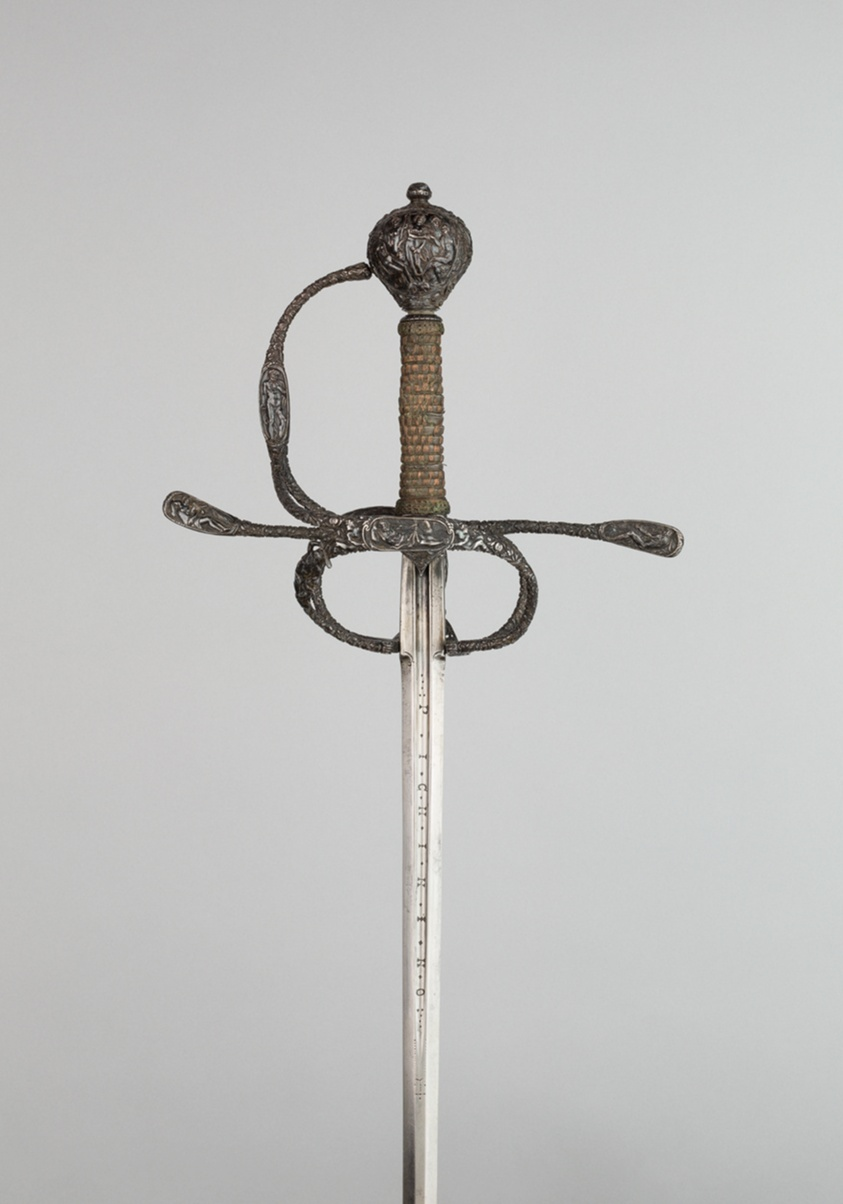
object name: Arms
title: Rapier and Scabbard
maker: Probably Flemish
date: c. 1630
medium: Steel, iron, copper, textile, leather, and wood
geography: Flanders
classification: edged weapon-sword; arms; arms and armor